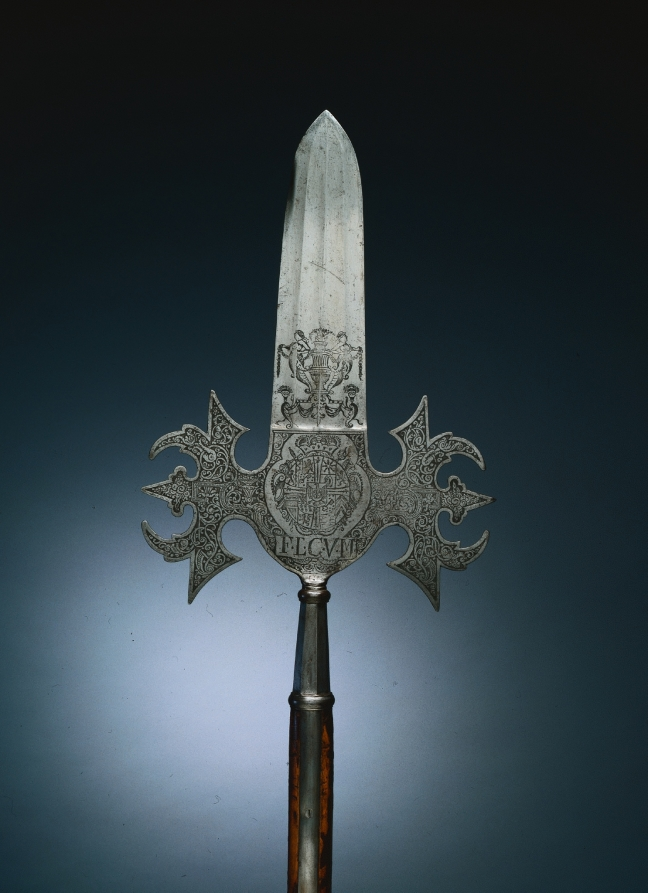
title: Partisan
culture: Germany, 18th century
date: 1729–32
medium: steel, etched, haft broken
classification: Arms and Armor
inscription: Coat of arms and letters F.L.C.V.M. (Franz Ludwig Kurfurst von Mainz)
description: The partisan, a staff weapon with a symmetrical head, was carried by infantry officers and members of princely bodyguards during the 1600s and 1700s. This one is inscribed with the coat of arms and letters F.L.C.V.M for Franz Ludwig Kurfurst von Mainz. Franz Ludwig (1664-1732) held the office from 1729-32.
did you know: Partisans were a favored weapon of palace guards and princely bodyguards; the large flat surface of the head lends itself perfectly for decorative coats of arms.